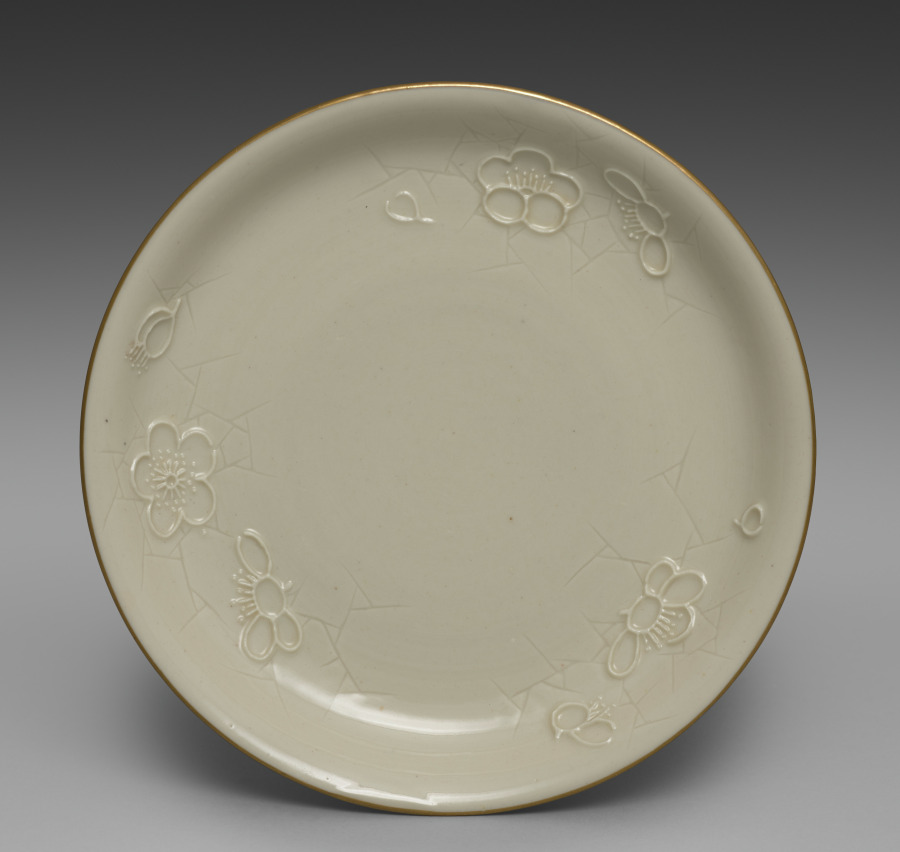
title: Medium-sized Dish from Dining Set with Plum Blossoms and Cracked-Ice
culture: Japan, Meiji period (1868–1912)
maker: Seifū Yohei II (Japanese, 1844–1878)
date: c. 1875–78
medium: Porcelain with molded designs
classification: Ceramic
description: Each item in this set has a delicate low-relief design of flowering plum branches over scattered, intersecting lines meant to resemble the cracked-ice surface of a frozen body of water and is signed on the base in gold pigment. While Yohei II produced many fine works in underglaze blue, like those produced by Kiyomizu Shichibei, he also made works in quite different styles later in his career, from the early 1870 s. In 1873, he was appointed purveyor to the Industrial Center of Kyoto Prefecture, a designation associated with Kyoto’s efforts to reach an international market through the port of Kobe; and from 1875 until his death, he was involved in national-level projects to present Japanese ceramics across the world. It was during this period that Yohei III was apprenticed to Yohei II, and it has been suggested that this set may in fact be an early example of Yohei III’s work, which he signed with his teacher’s name. Decorated with flowers resembling Japanese textile motifs, the set calls to mind the design of Yohei II’s pair of vases with plum blossoms in the Victoria and Albert Museum. Here, the elaborate trees created for a formal public exhibition setting have been translated into the approachable blossoms of the genteel domestic environment. While the designs are consistent across the pieces, each raised flower petal and pistil and each incised line in the ice was done by hand, so the cups, bowls, and dishes are similar yet unique. The bottoms of two boxes once identified the set’s owner, but the information has been deliberately obscured with black ink. However, inscriptions still visible appear to indicate two occasions, once at the end of July 1886 , and once again in June 1916 , when parts of the set were requested from Hokura in Niigata Prefecture. The location corresponds to a neighborhood in the present-day city of Jōetsu. The surname Tsuji 辻 also appears on a paper tag affixed to one of the box cloths. Future research may possibly reveal more about their provenance. A vase by Yohei III in a private collection combines the formal grandeur of the Yohei II vases in the Victoria and Albert Museum with the gentler design of this dining set, placing flowering plum trees against soft, scalloped-edge clouds resembling those in golden screens.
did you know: The dining wares have a creamy white coloration that the four boxes containing them identify as Korean in style.